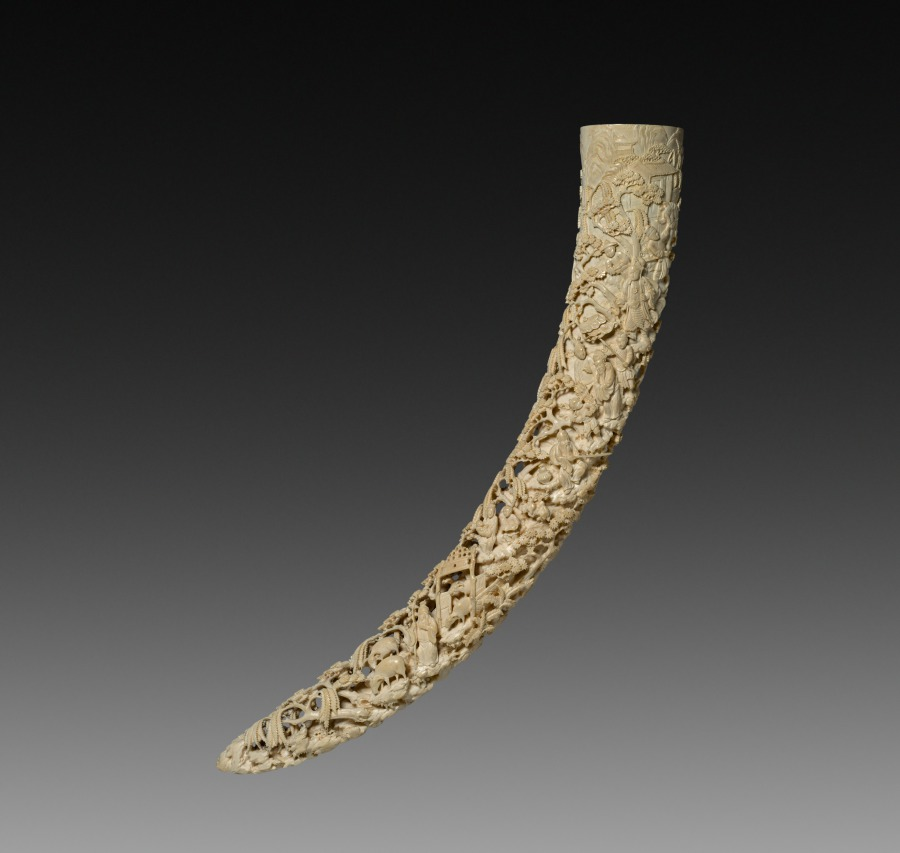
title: Tusk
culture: China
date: 1800s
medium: ivory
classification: Ivory